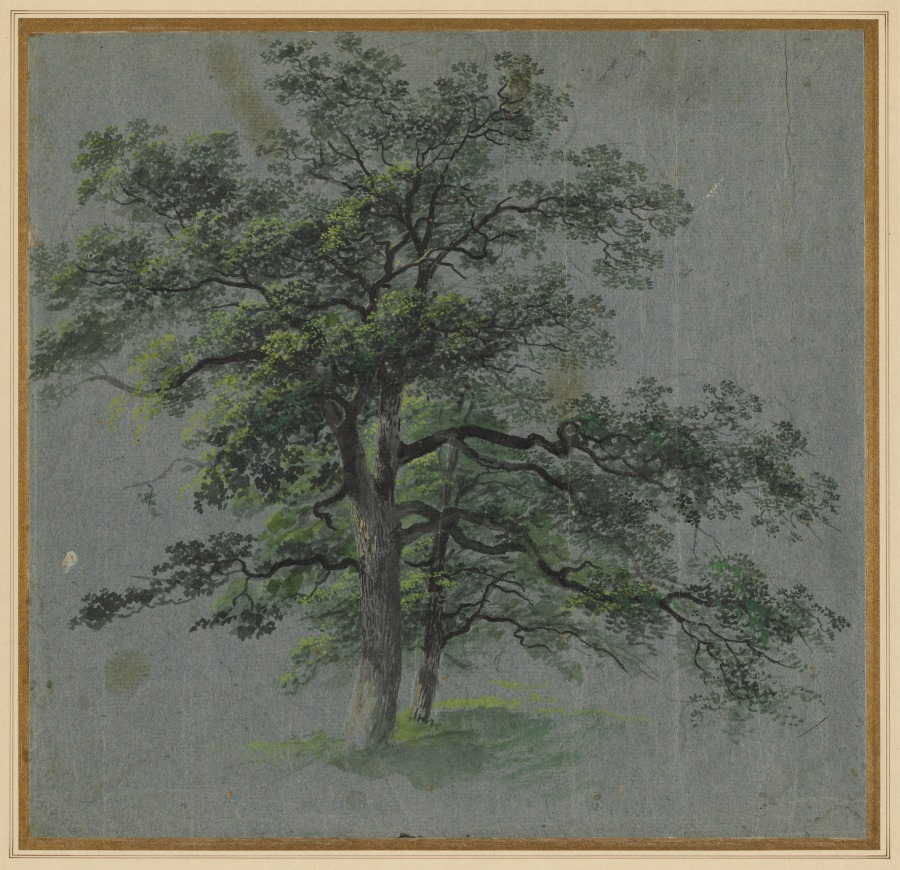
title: Two Trees (recto) Tree Studies (verso)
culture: Germany, 19th century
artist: Johann Jacob Dorner (German, 1775–1852)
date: first half 1800s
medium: brush and black and gray wash, gouache, and watercolor, with stylus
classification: Drawing